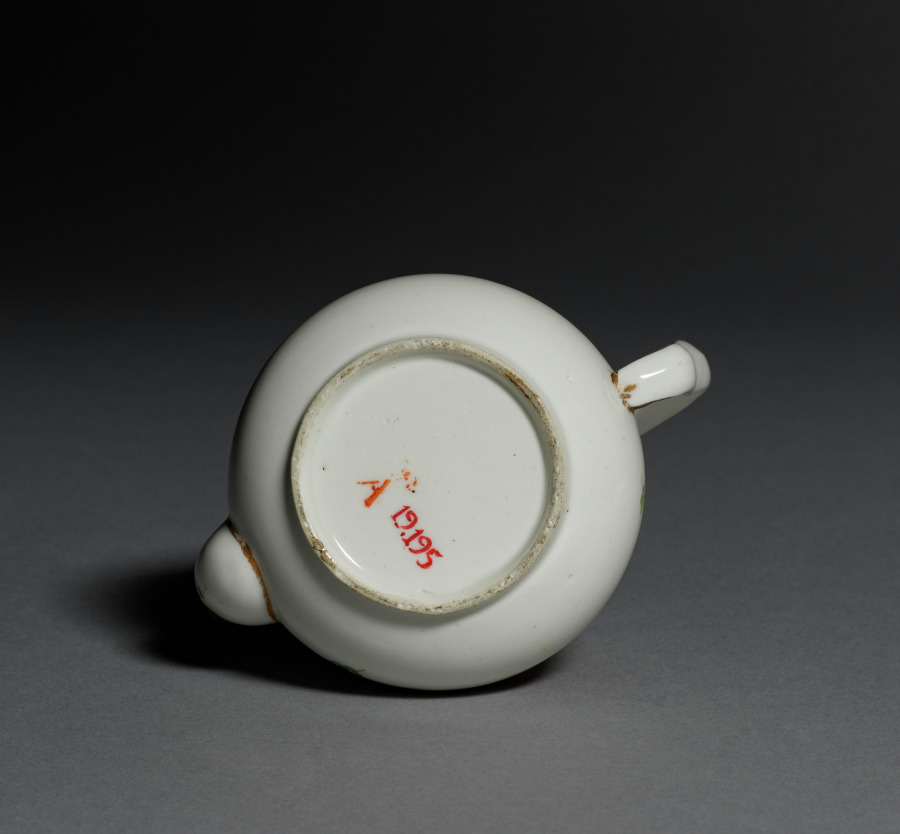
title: Teapot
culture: France, Paris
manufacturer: Rue Thiroux Factory (French)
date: c. 1780s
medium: hard-paste porcelain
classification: Ceramic